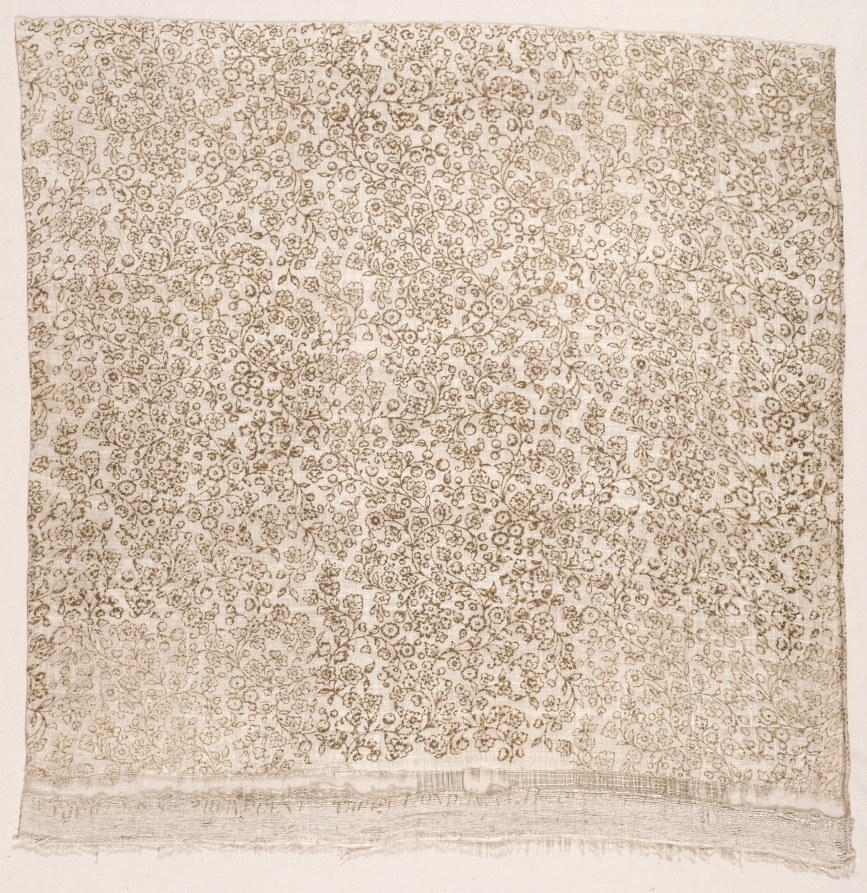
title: Liberty Printed Silk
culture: England, late 19th century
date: c. 1880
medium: gold leaf printed on hand-woven silk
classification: Textile